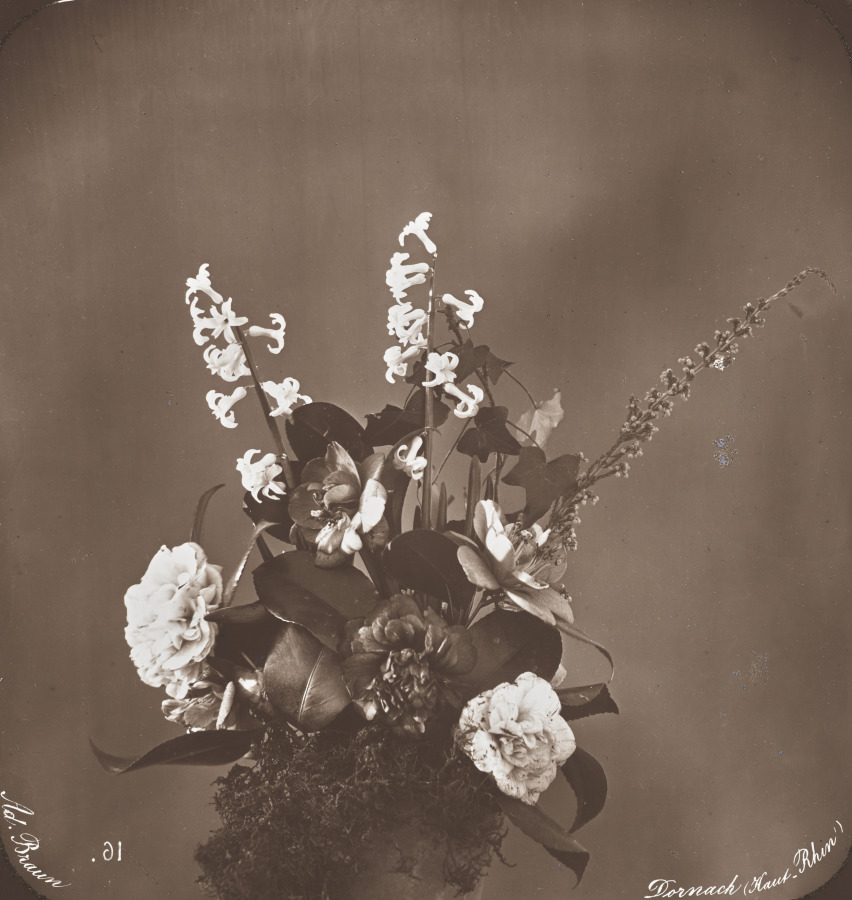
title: Untitled (flower arrangement)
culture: France, 19th century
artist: Adolphe Braun (French, 1812–1877)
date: Early 1850s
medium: albumen print or carbon print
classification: Photograph